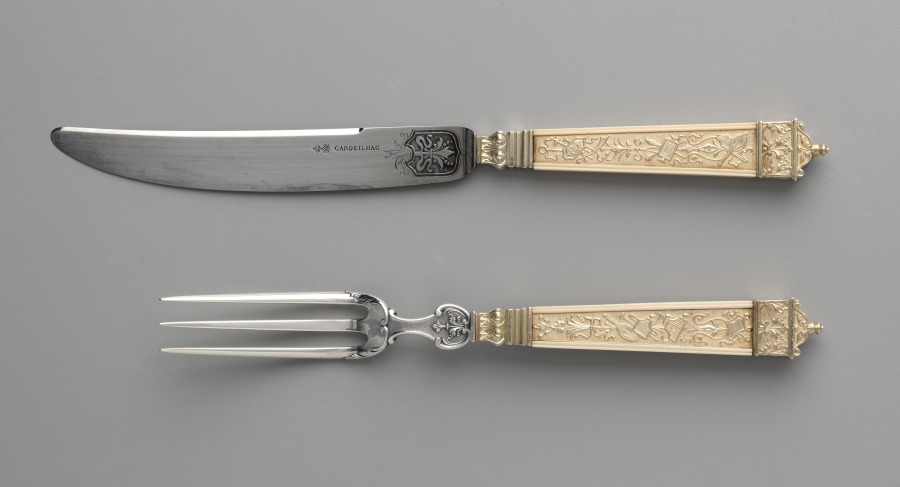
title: Dessert Knife and Fork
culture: France, 19th century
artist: Maison Cardeilhac (French)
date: c. 1880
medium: gilt silver and ivory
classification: Silver